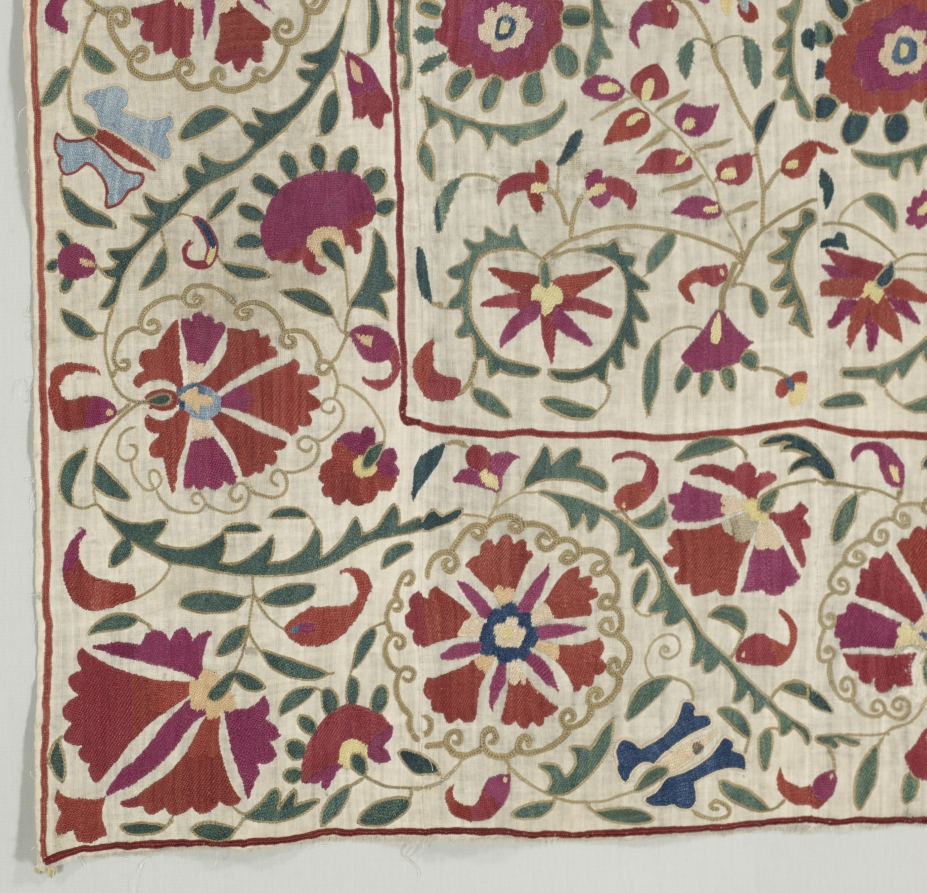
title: Suzani: Curtain or Bed Cover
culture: Uzbekistan, Bukhara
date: c. 1800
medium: Cotton: plain weave; silk: embroidery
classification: Embroidery